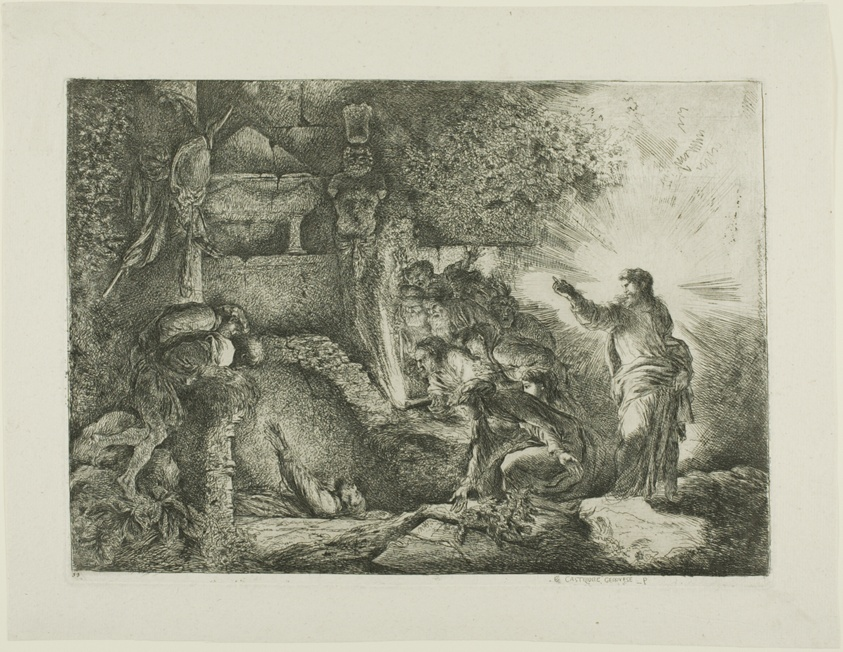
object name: Print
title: The Raising of Lazarus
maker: Giovanni Benedetto Castiglione (Italian, 1609-1664)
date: c. 1649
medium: Etching on ivory laid paper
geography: Italy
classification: etching; prints and drawing; print